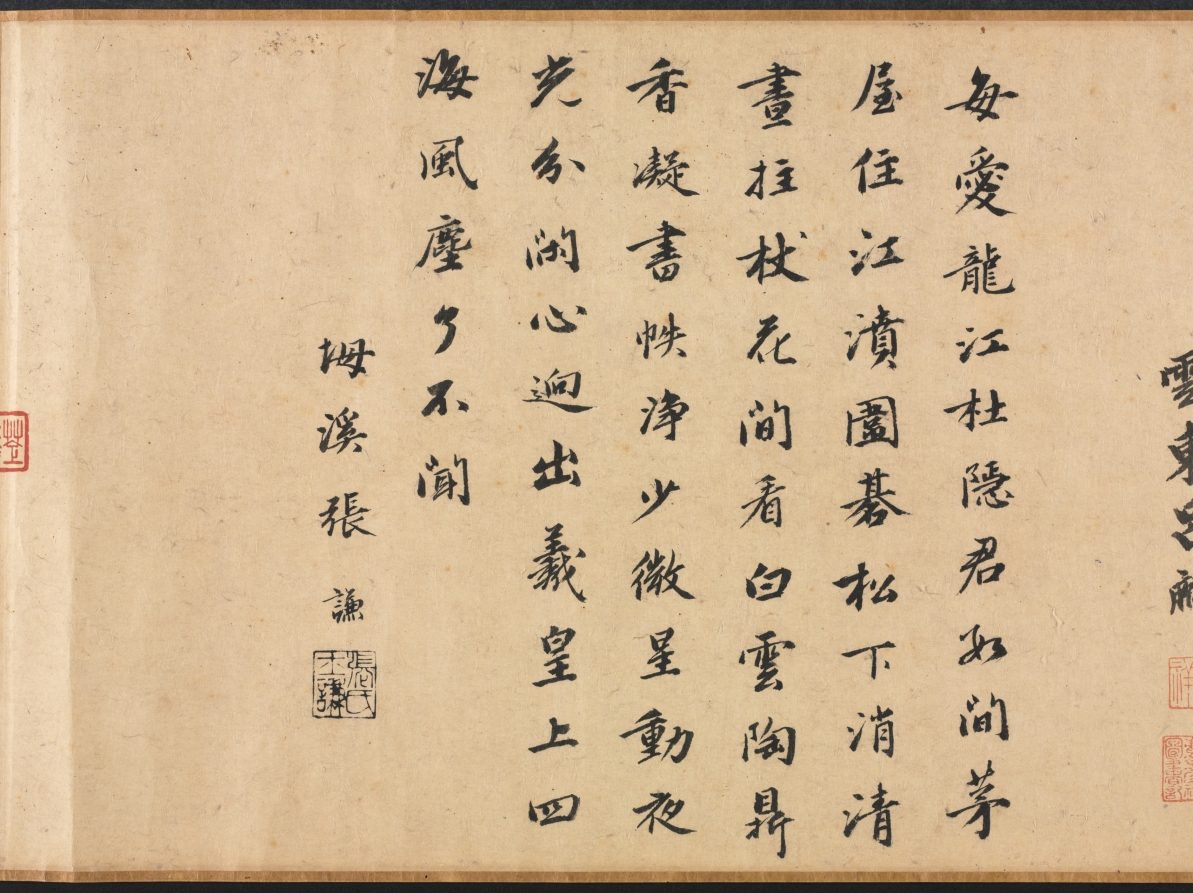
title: Leisure Enough to Spare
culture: China, Yuan dynasty (1271-1368)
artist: Yao Tingmei (Chinese, active mid-1300s)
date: 1360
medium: handscroll, ink on paper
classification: Painting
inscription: 至正廿年春正月_日作此併系鄙語于尾 地偏人遠閉柴關，滿院松陰白晝閒。 眼底風塵渾忘却，坐看流水臥看山。 吳興姚廷美畫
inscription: 23 colophons and 53 seals (dates unavailable for some): 1 colophon, dated 1360, and 2 seals of Yang Weizhen (1296-1370); 1 colophon and 3 seals of Wan Yi; 1 colophon of Zhang Junde; 1 colophon and 3 seals of Angji (act. ca. mid-14th c.); 1 colophon and 1 seal of Xu Shiquan; 1 colophon and 3 seals of Gao Yu; 1 colophon and 2 seals of Li Mingfu; 1 colophon and 2 seals of Lu Lin; 1 colophon and 1 seal of Zhang Qian; 1 colophon of Tao Tangwen; 1 colophon and 1 seal of Wu Yuangui (act. ca. 1300-60); 1 colophon of Bao Jiong; 1 colophon of Wang Zao; 1 colophon and 1 seal of Ma Chuyi; 1 colophon and 1 seal of Lin Yizhuang; 1 colophon and 1 seal of Gu Shunju; 1 colophon and 2 seals of Wang Jing; 1 colophon and 2 seals of Lin Shouchang; 1 colophon and 1 seal of Gao Zhidao; 1 colophon of Lin Xun; 1 colophon, dated 1359, and 2 seals of Meng Weicheng (act. mid-14th c.); 1 colophon and 1 seal of Meng Zhiji (act. mid-l4th c.); 14 seals of Liang Qingbiao 梁清標 (1620-1691); 1 poem dated 1755 and 5 seals of the Qianlong 乾隆 emperor (r. 1736-95); 2 seals of the Jiaqing 嘉慶 emperor (r. 1796-1821); 3 seals of the Xuantong 宣統 emperor (r. 1909-11).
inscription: Title on frontispiece by Zhang Bi 章弼: Signed Gongchen 拱辰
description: Seclusion and leisure—the ideals of the literati, or scholar-gentlemen—are expressed in this mature work by Yao Tingmei. The theme acquired special meaning at a time of the military uprisings near the end of the Yuan dynasty. Dedicated to an ascetic named Du, this work combines painting, calligraphy, and poetry; following the painting are more than 20 poems and essays written by notable scholars, one of whom was the calligrapher Yang Weizhen. It reveals not only the aesthetic taste of the literati but also the practice of contributing artistic and literary works to fulfill social obligations. Yao's painting demonstrates his individual style derived from various ancient masters (Guo Xi, Dong Yuan, and Juran). Yang Weizhen's calligraphy exhibits his bold, vigorous style and his intent to capture the spirit of antiquity in art.